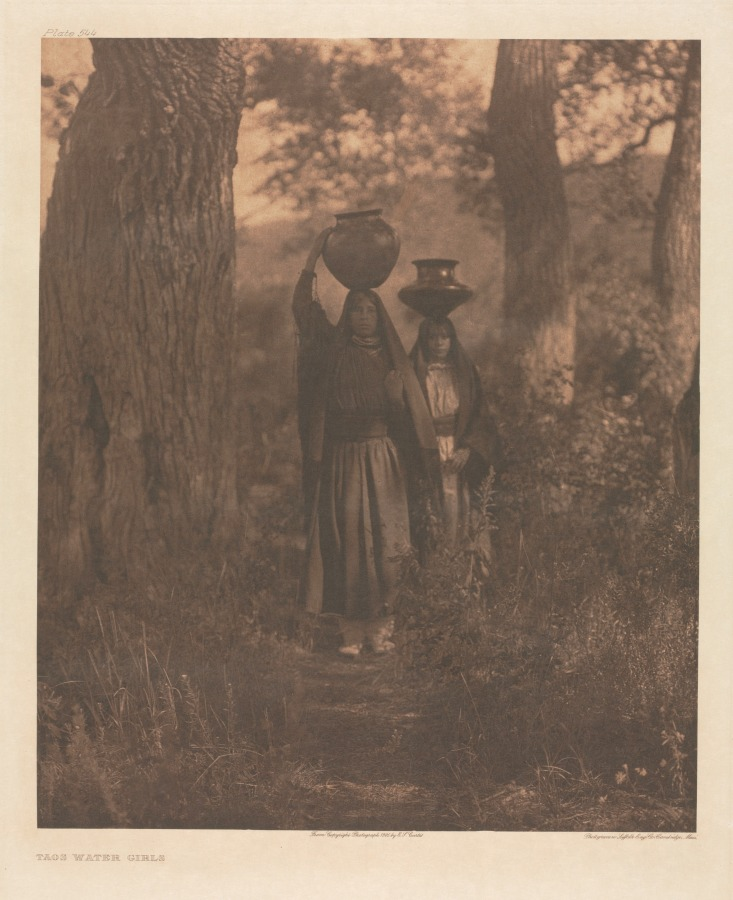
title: Portfolio XVI, Plates 544- 579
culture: America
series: The North American Indian: being a series of volumes picturing and describing the Indians of the United States, The Dominion of Canada, and Alaska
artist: Edward S. Curtis (American, 1868–1952)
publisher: The University Press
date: 1904–25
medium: photogravure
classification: Portfolio